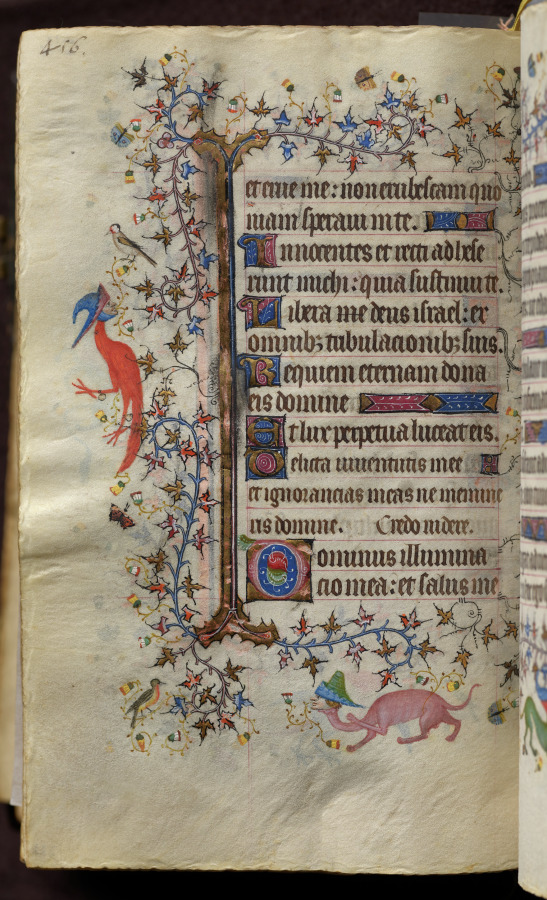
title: Hours of Charles the Noble, King of Navarre (1361-1425): fol. 222v, Text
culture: France, Paris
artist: Master of the Brussels Initials and Associates (French)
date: c. 1405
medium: ink, tempera, and gold on vellum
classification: Bound Volume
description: This precious volume was obviously highly prized by its owner, the French-born King of Navarre, who had his coat of arms painted on no less than twenty folios. Rather than directly commissioning this manuscript from a specific workshop, it seems that Charles the Noble acquired his book of hours -- perhaps ready-made for the luxury market -- while on a trip to Paris in 1404-05. A collaborative effort, six painting styles are evidenced within the pages of this codex, those of two Italians, two Frenchmen, and two Netherlanders. The painter who was responsible for the planning and decoration of the book, and who produced seventeen of the large miniatures, was a Bolognese artist known as the Master of the Brussels Initials. His principal assistant, responsible for most of the borders, was a Florentine who signed his name "Zecho" da Firenze on folio 208 verso.